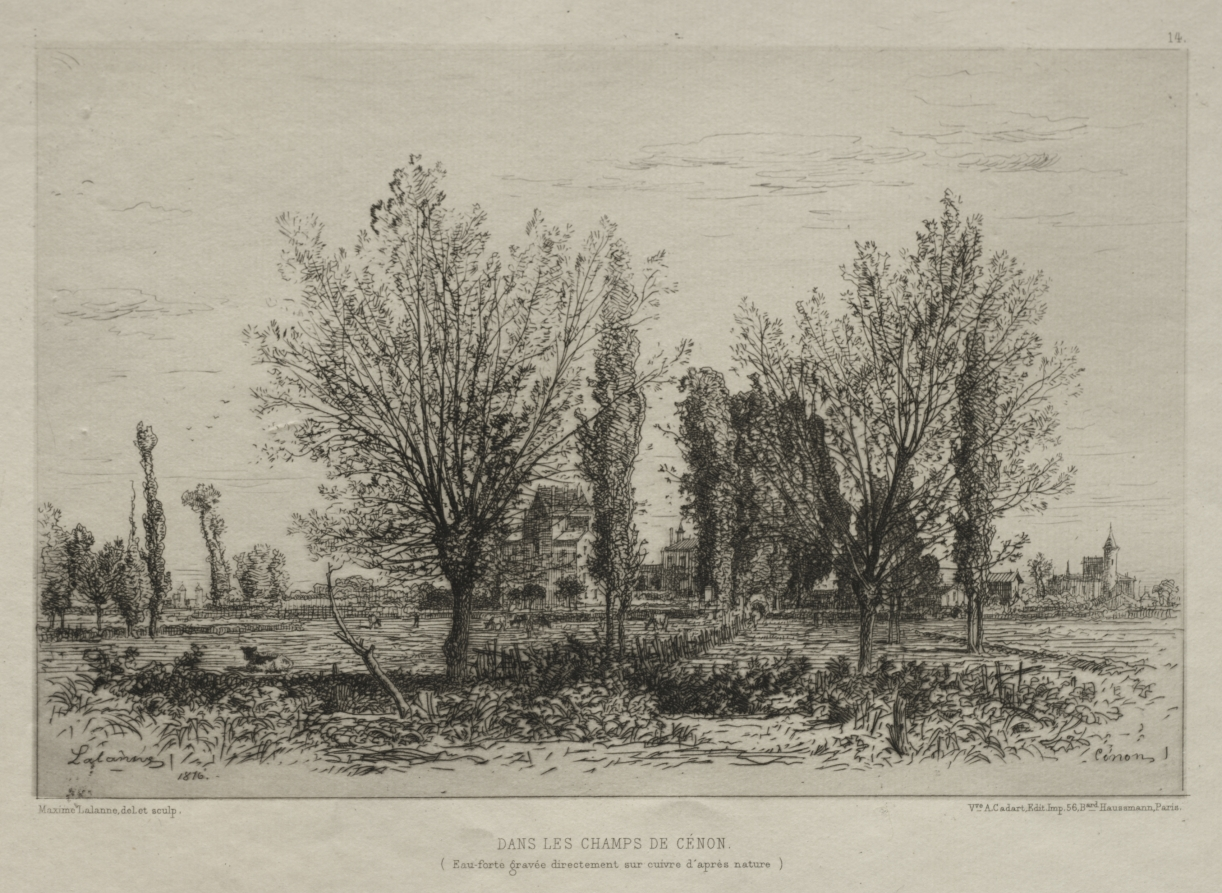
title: Dans les Champs de Cénon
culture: France, 19th century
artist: Maxime Lalanne (French, 1827–1886)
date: 1876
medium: etching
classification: Print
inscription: inscribed in plate: Lalanne/ 1876 (l.l); printed in lower margin: Maxime Lalanne, del. et sculp. (l.l.); Vve A. Cadart, Edit, Imp. 56, Bard Haussmann, Paris (l.r); DANS LES CHAMPS DE CÉNON./ (Eau-forte graveé directement sur cuivre d'apres nature) (l.c); 14 (u.r)